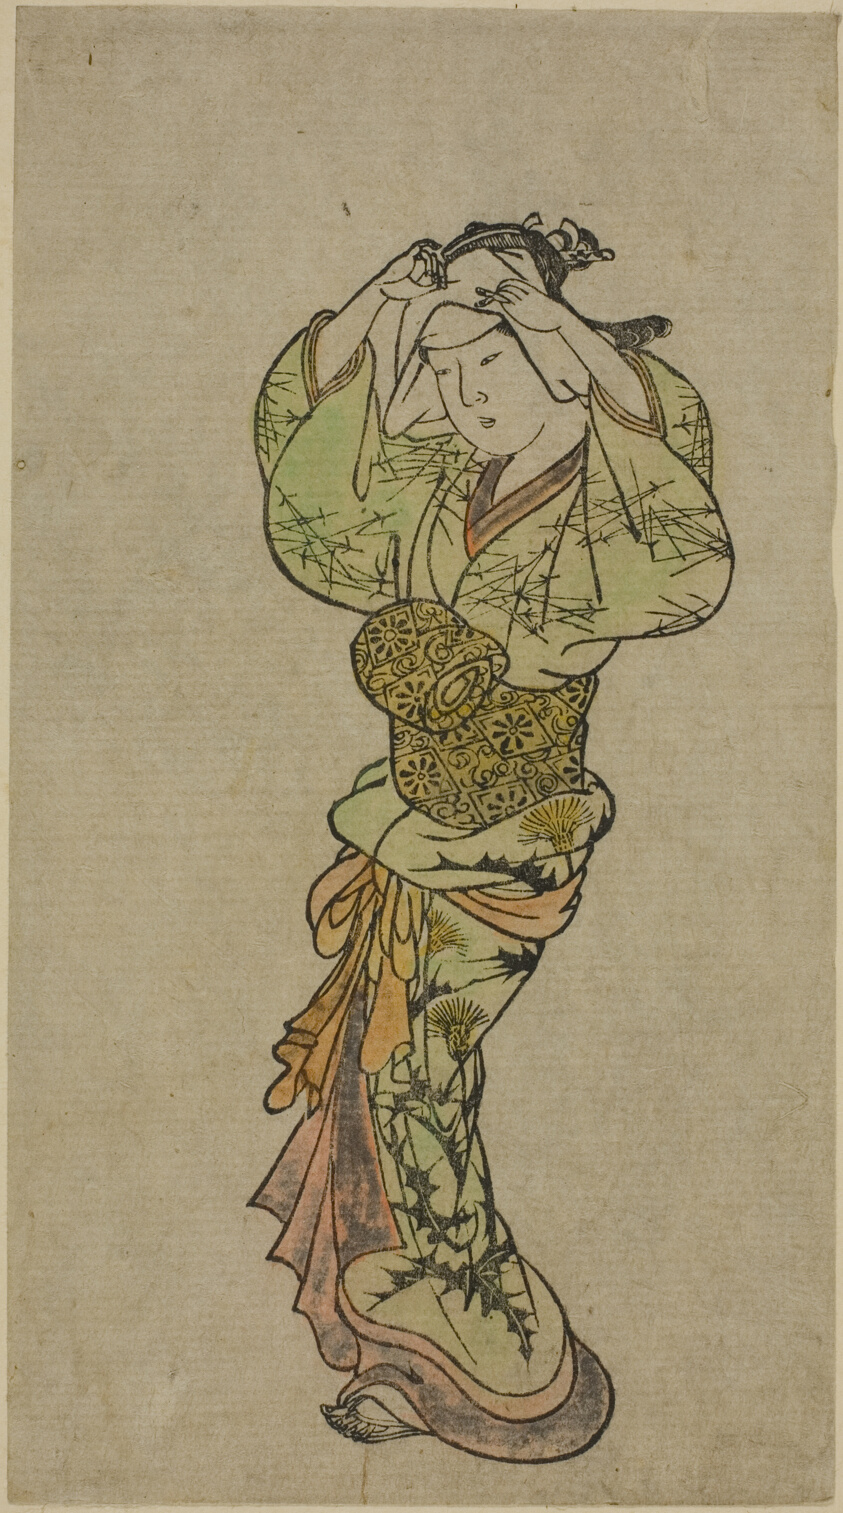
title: A Dancer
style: edo (japanese period), Japanism, East Asian, asian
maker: Nishikawa Sukenobu (Japanese, 1671-1750)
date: Edo period (1603–1867)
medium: Color woodblock print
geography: Japan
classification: woodblock print; print; asian art